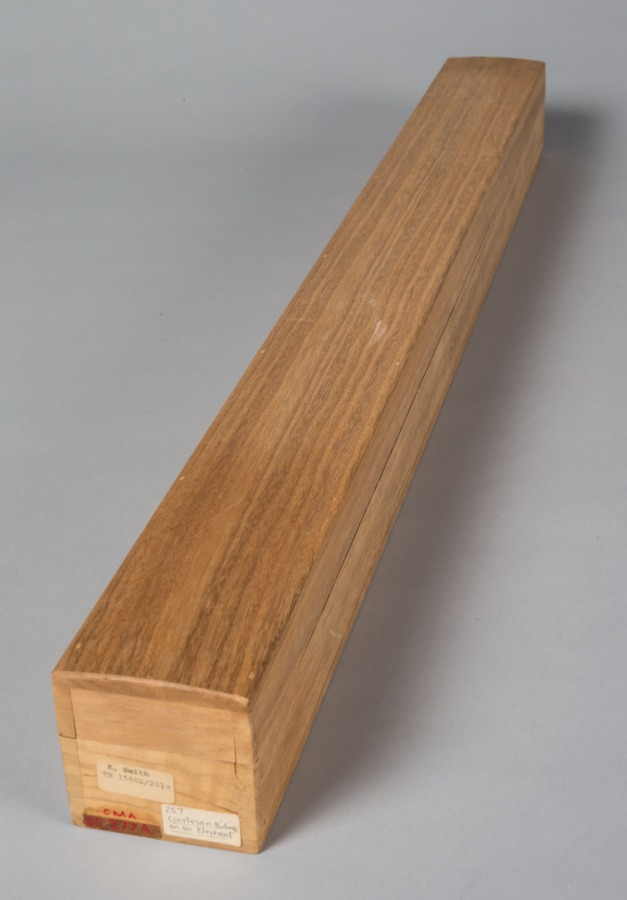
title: Stand-in Fugen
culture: Japan, Edo period (1615–1868)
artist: Kitao Masayoshi (Japanese, 1761–1824)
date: late 1700s–early 1800s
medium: hanging scroll; ink and color on silk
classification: Painting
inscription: artist's signature and two seals, lower right.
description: Here, a woman dressed as a man replaces Fugen, a bodhisattva—a being among those considered enlightened in Buddhism—who symbolizes learning as a path to awakening and typically rides an elephant. The painting teaches the lesson of impermanence through the petals falling from the lotus flower the woman holds. It also alludes to the legend of Eguchi, a 12th-century courtesan who, following an encounter with a Buddhist monk-poet called Saigyō, revealed herself to be a manifestation of Fugen.